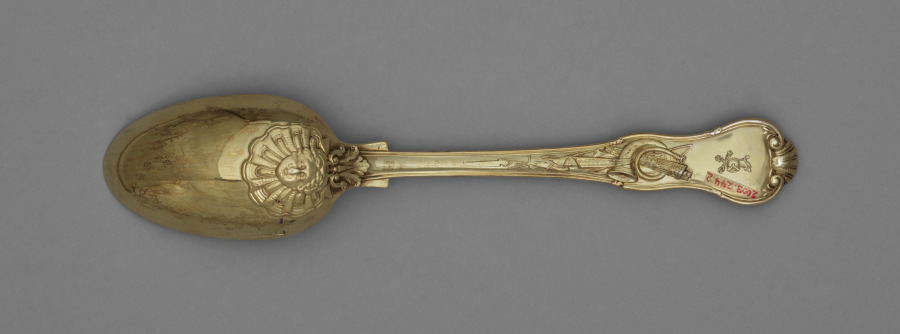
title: Dessert Spoon with Hunt Scenes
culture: England, London, 19th century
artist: Paul Storr (British, 1771–1844)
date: c. 1822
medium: gilt silver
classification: Silver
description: Paul Storr was perhaps the most famous and successful English silversmith working in the early 19th century. This fork and spoon were originally part of a larger set. The exceptionally high quality of the metalworking and gilding of these pieces is typical of Storr's work.